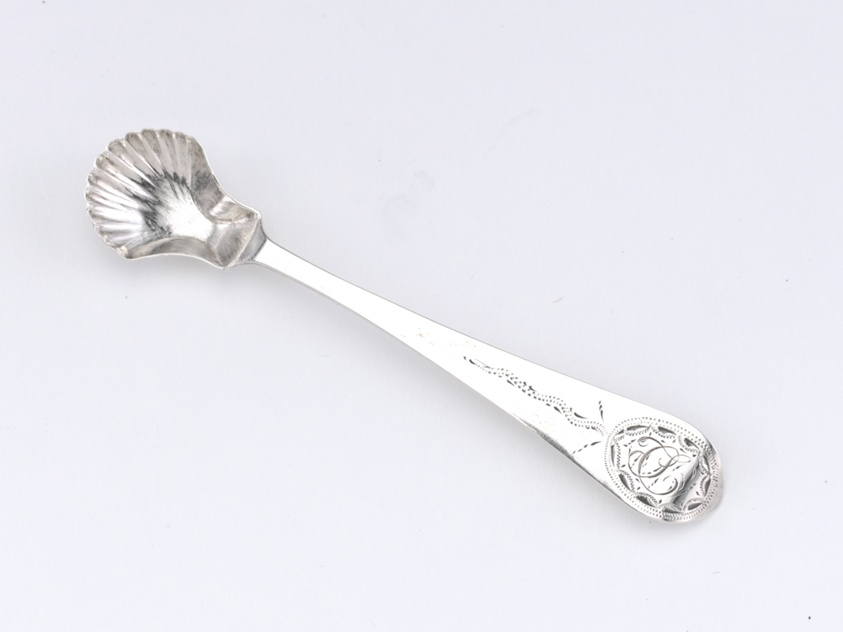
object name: Metalwork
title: Pair of Salt Spoons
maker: John Samuel Krause (American, 1782–1815); Bethlehem, Pennsylvania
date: 1805–15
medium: Silver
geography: Bethlehem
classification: spoon; silver; utensil; american decorative arts; american arts; decorative arts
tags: spoon